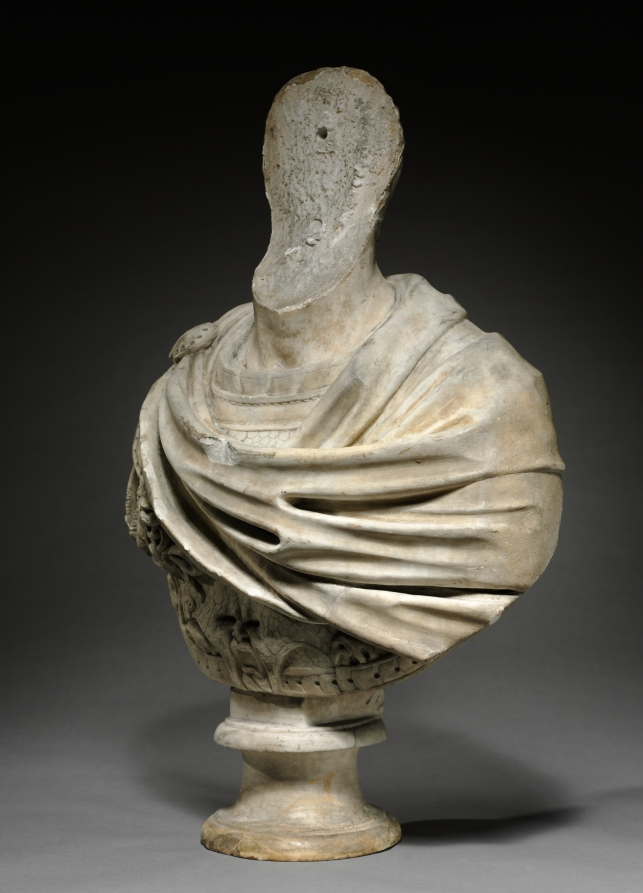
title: Bust of a Man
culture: Italy, Face: Roman, early 2nd century or later; Body: 16th century or later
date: Face: early 2nd century or later. Body: 1500s or later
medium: marble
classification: Sculpture